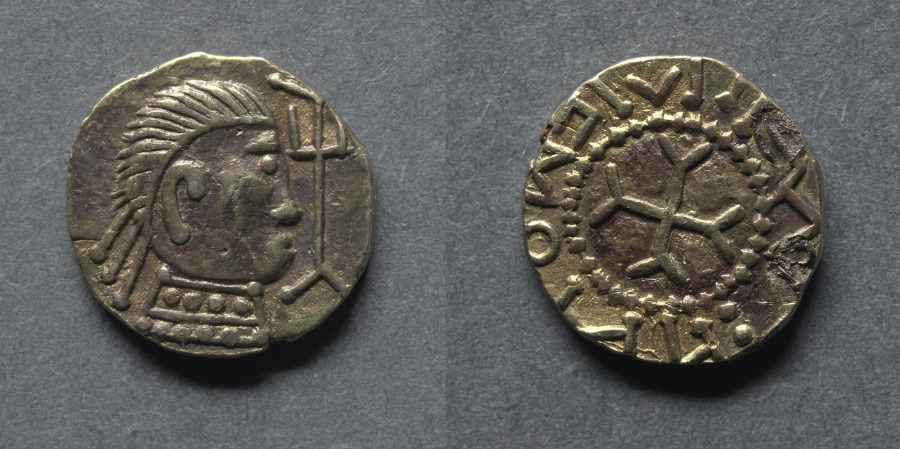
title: Witmen Tremissis: Bust and Trident (obverse); Cross Fourchée (reverse)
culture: England, Anglo-Saxon, early 7th century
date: early 600s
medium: gold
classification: Coins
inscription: WITMEN MONITA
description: The Crondall Hoard is a hoard of coins that was found in 1828 in the village of Crondall in the English county of Hampshire. It is believed to date to the seventh century and was studied by Dr. Carol Humphrey Vivian Sutherland (1908-1986), an English numismatist. He characterized this coin as being a close copy of the Witmen prototype, the most common type found in the hoard. Witmen, or his design, featuring a bust on one side and a cross on the other, seems to have been very popular and remained popular for many years. During this time however the portraits grew cruder and cruder, the legends became even more blundered, and the gold content fell lower and lower.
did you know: The tremissis was a small solid gold coin of late antiquity and was a third of a solidus.